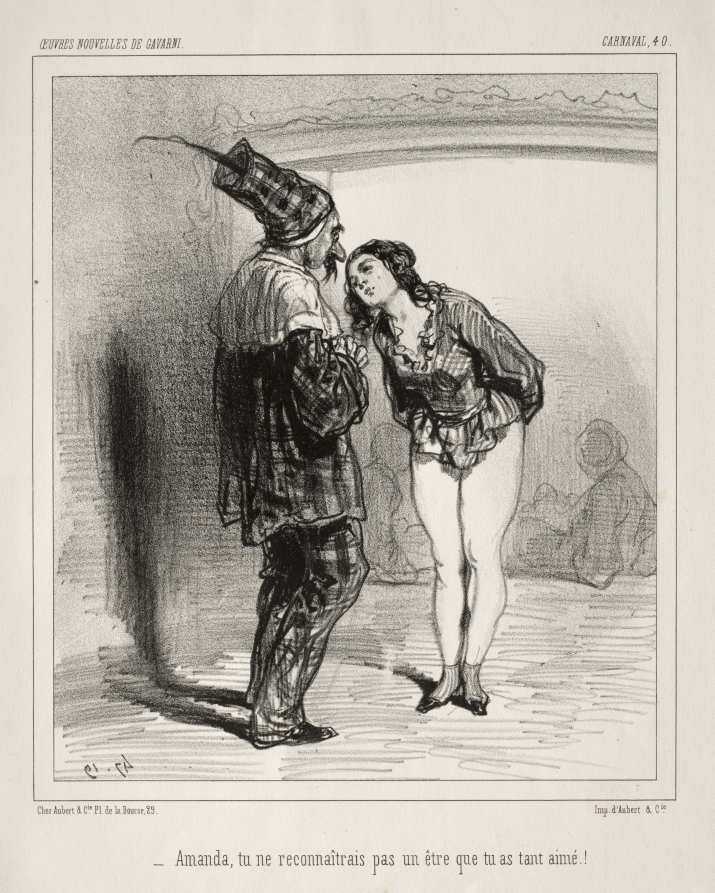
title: Carnaval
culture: France, 19th century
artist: Paul Gavarni (French, 1804–1866)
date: c. 1841–47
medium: lithograph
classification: Print